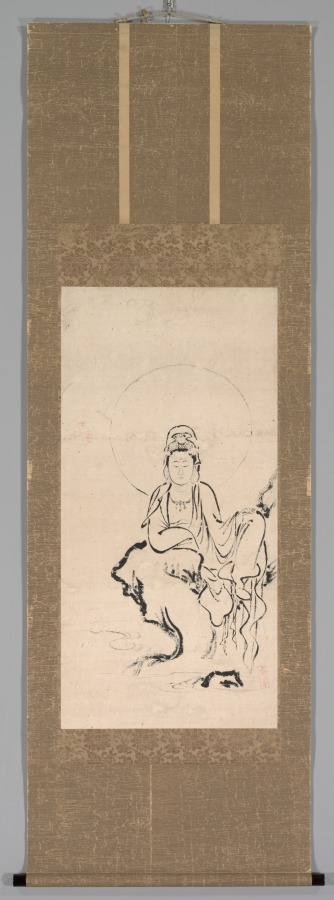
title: White-Robed Kannon (Byakue Kannon)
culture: Japan, Kamakura period (1185–1333)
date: c. 1200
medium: hanging scroll; ink on paper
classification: Painting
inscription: 箱書 石座観音 高山寺舊蔵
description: Kannon is a deity of mercy and compassion in the Buddhist faith. This monochrome sketch comes from Kōzan-ji, a temple in northwest Kyoto. The subdued ink tones and plain brushwork reflect the taste of Zen Buddhism, which began to have an impact on the visual arts in 13th-century Japan.